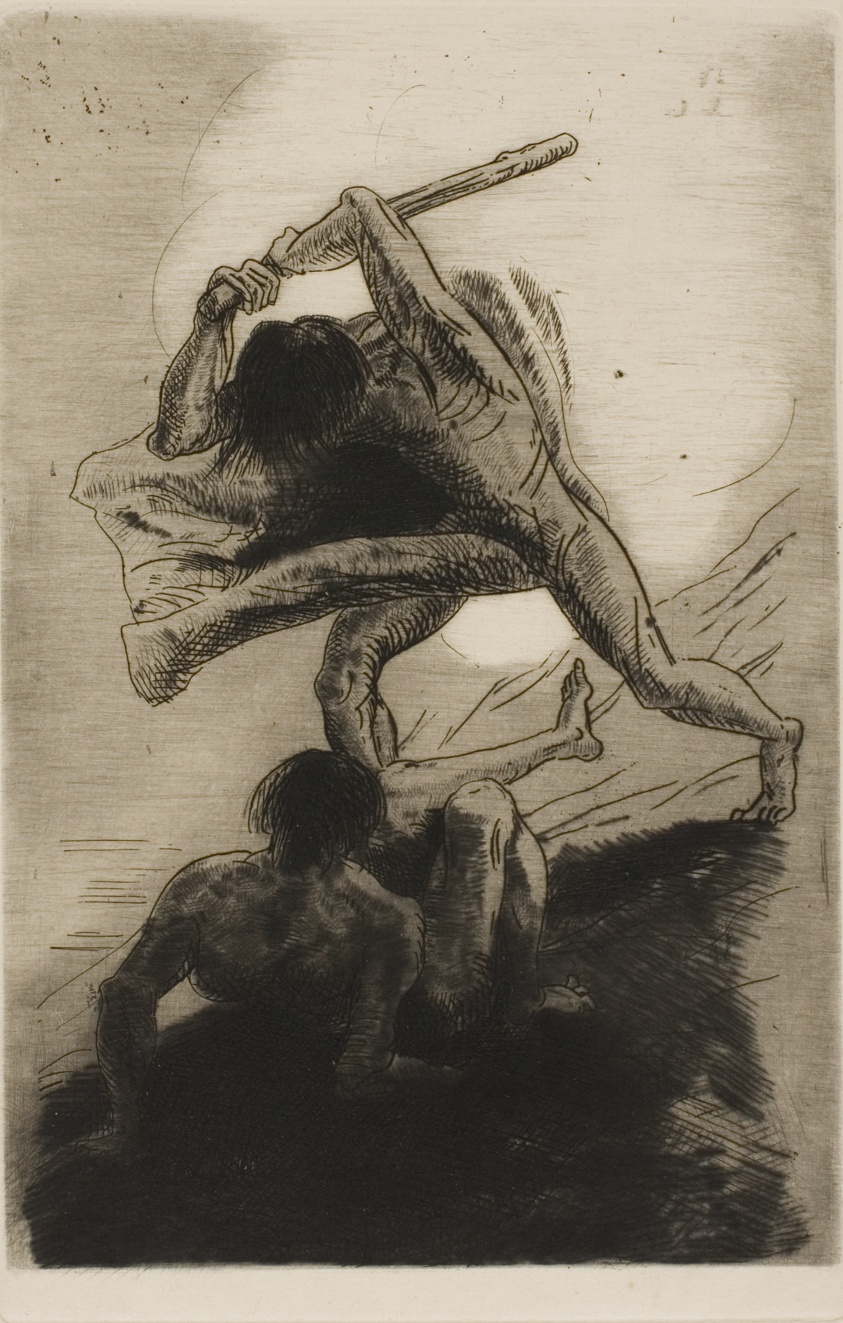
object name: Print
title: Cain and Abel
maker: Odilon Redon (French, 1840-1916)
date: 1886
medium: Etching and drypoint on ivory laid paper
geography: France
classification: etching; print; prints and drawing; paper